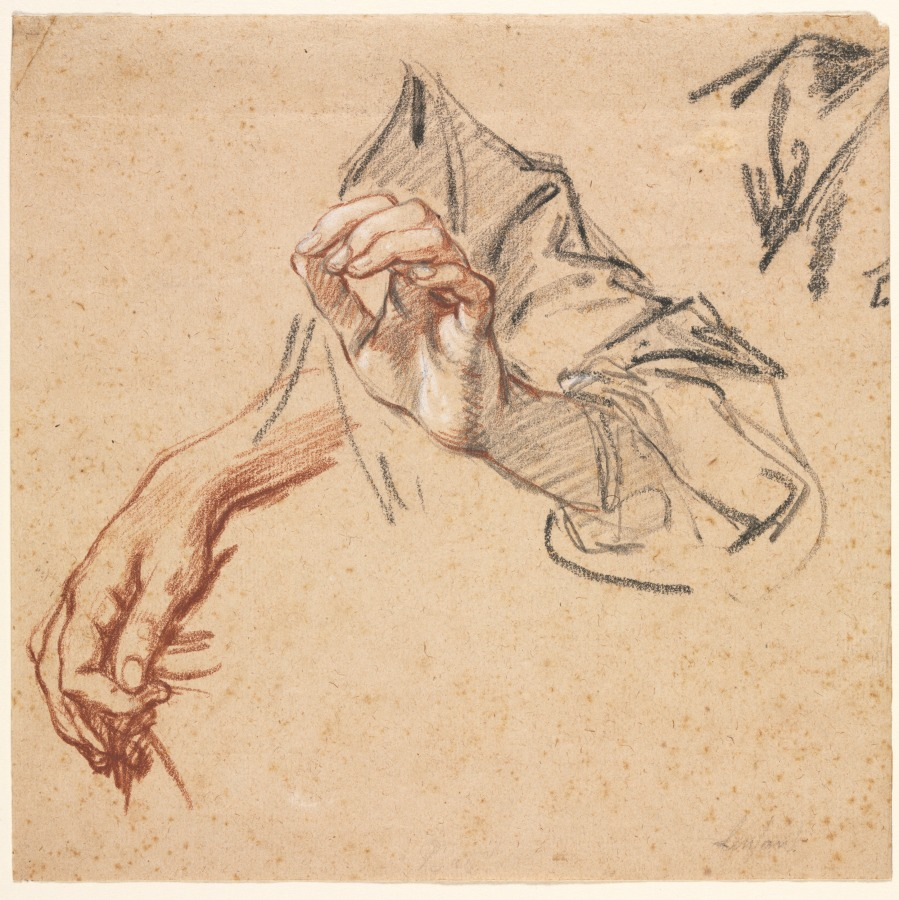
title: Study of Hands (recto); Sketch of a Hand (verso)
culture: France, 18th century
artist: Pierre Lenfant (French, 1704–1787)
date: 1700s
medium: red and black chalk heightened with white chalk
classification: Drawing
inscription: lower right, in graphite: lenfant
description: After Pierre Lenfant served as the official battlefield artist to King Louis XV in the War of the Austrian Succession (1740–1748), he and his family were awarded a lifetime residence at the royal Gobelins Manufactory on the outskirts of Paris. This delicate study in colored chalks may depict a weaver pulling threads in the textile factory.